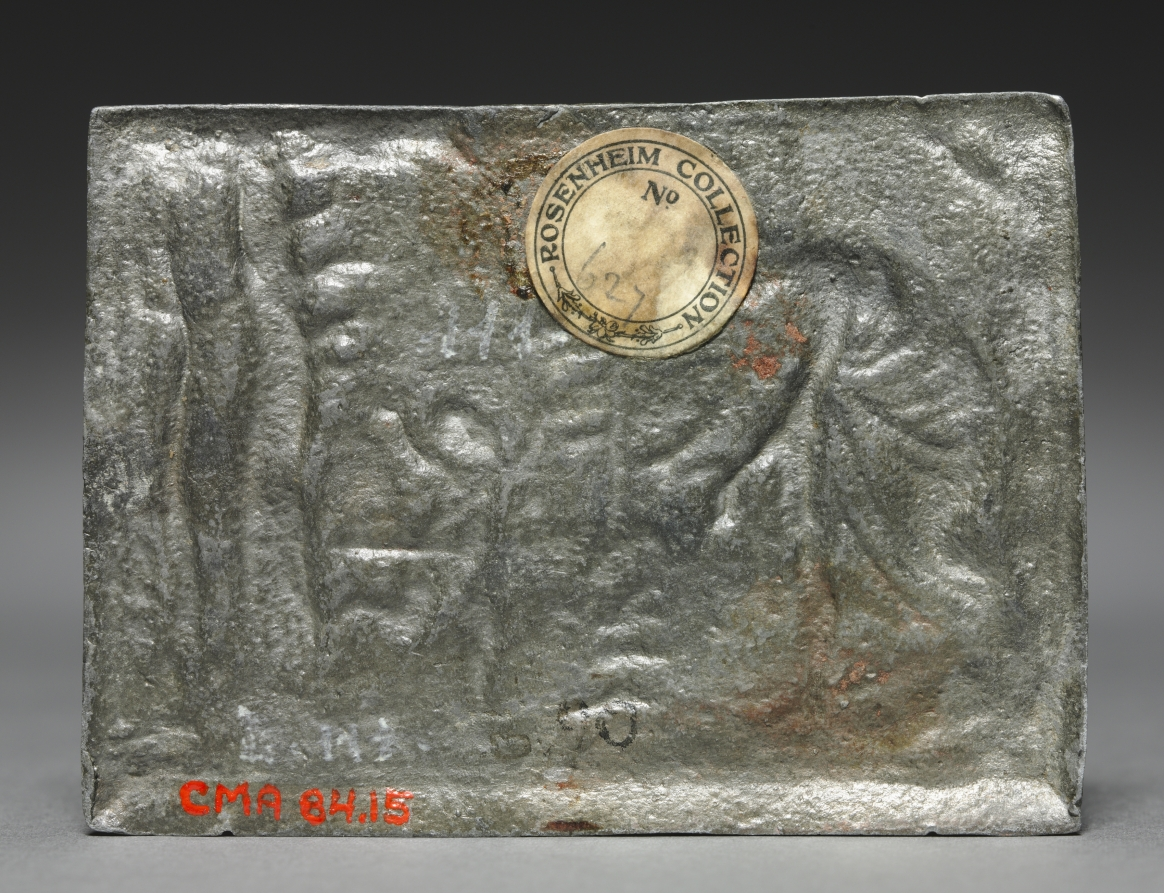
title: Cupid Complaining to Venus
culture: Germany, Nuremberg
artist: Peter Flötner (German, 1485–1546)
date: c. 1540–46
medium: lead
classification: Sculpture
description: This plaquette interprets an ancient Greek poem by Theocritus. Having been stung by a swarm of bees after attempting to steal their honey, Cupid sought refuge in the arms of his mother Venus, the goddess of love. Surprised that such small creatures could cause such great pain, Venus reminded Cupid, that like the sting of a bee, love’s arrow could be dangerous.